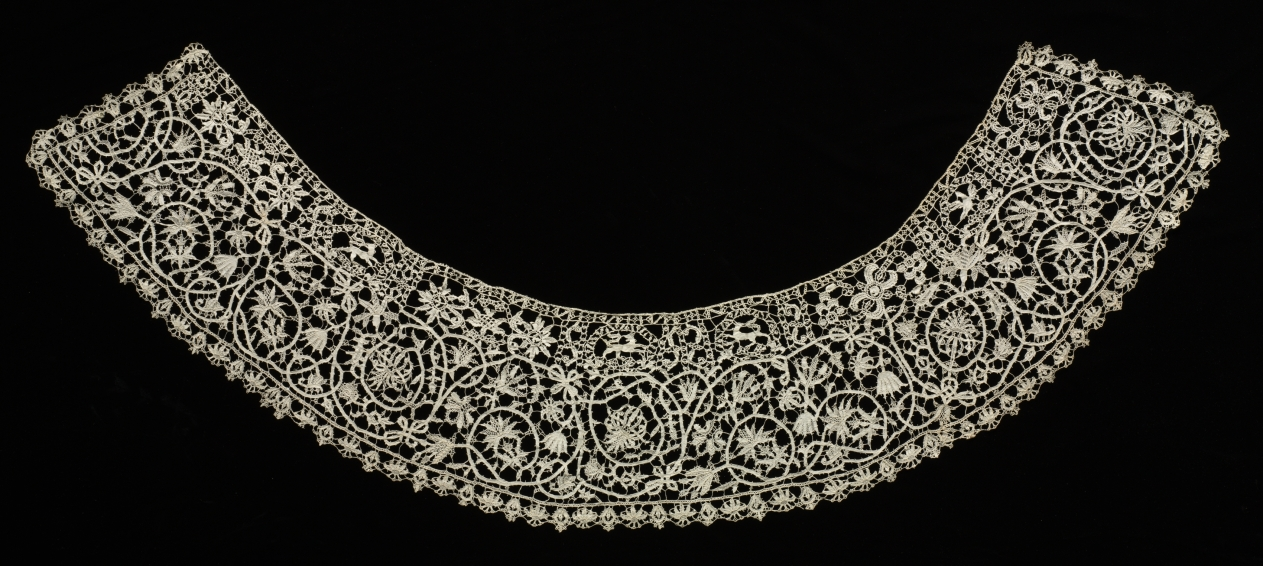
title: Lace Collar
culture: Italy, Venice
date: 1500s–1600s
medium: Needle lace (Punto in aria)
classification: Lace